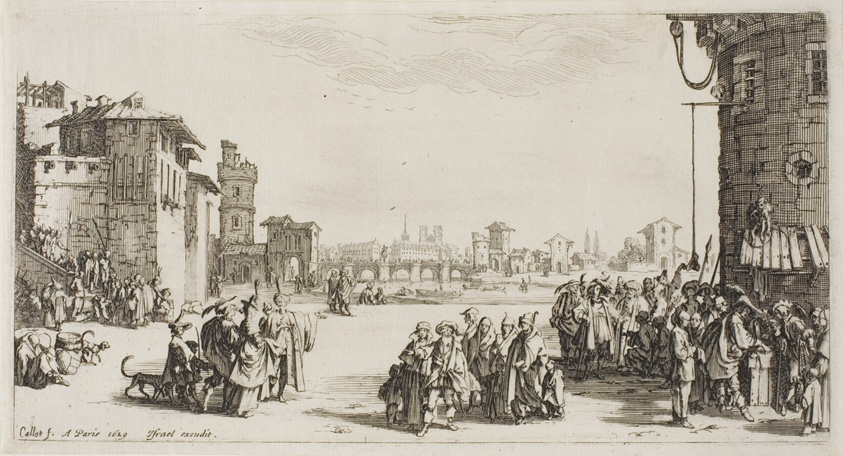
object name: Print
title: The Slave Market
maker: Jacques Callot (French, 1592-1635)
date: 1629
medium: Etching on paper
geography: France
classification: etching; print; prints and drawing